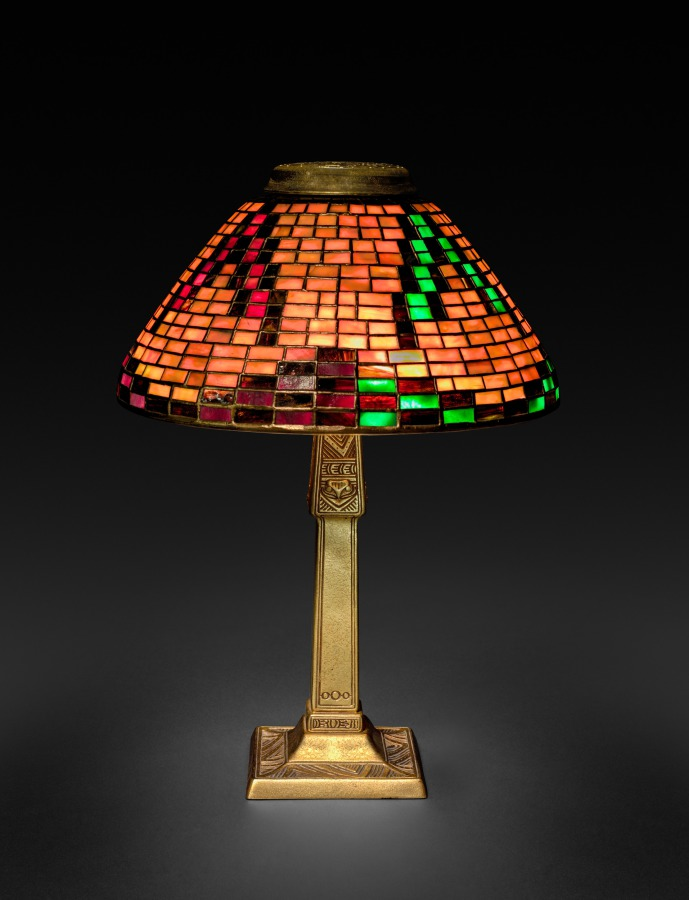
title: Indian Basket Lamp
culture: America, New York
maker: Tiffany Studios (United States, New York, 1902–32)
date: c. 1902–10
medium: Leaded glass, gilt bronze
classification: Lamp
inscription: inside bottom rim of shade: Tiffany Studios New York 1586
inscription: stamped on underside of base: Tiffany Studios/New York/536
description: An admirer of Native American art, Louis Comfort Tiffany amassed a personal collection of textiles, baskets, and pottery, from which he and his designers drew inspiration. He was particularly interested in the way basket weavers formed their patterns using geometric grids, a look he re-created in designs for lamps, such as the Indian Basket lamp.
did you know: This lamp features dichroic glass, which appears green in reflected light but glows amber when illuminated.